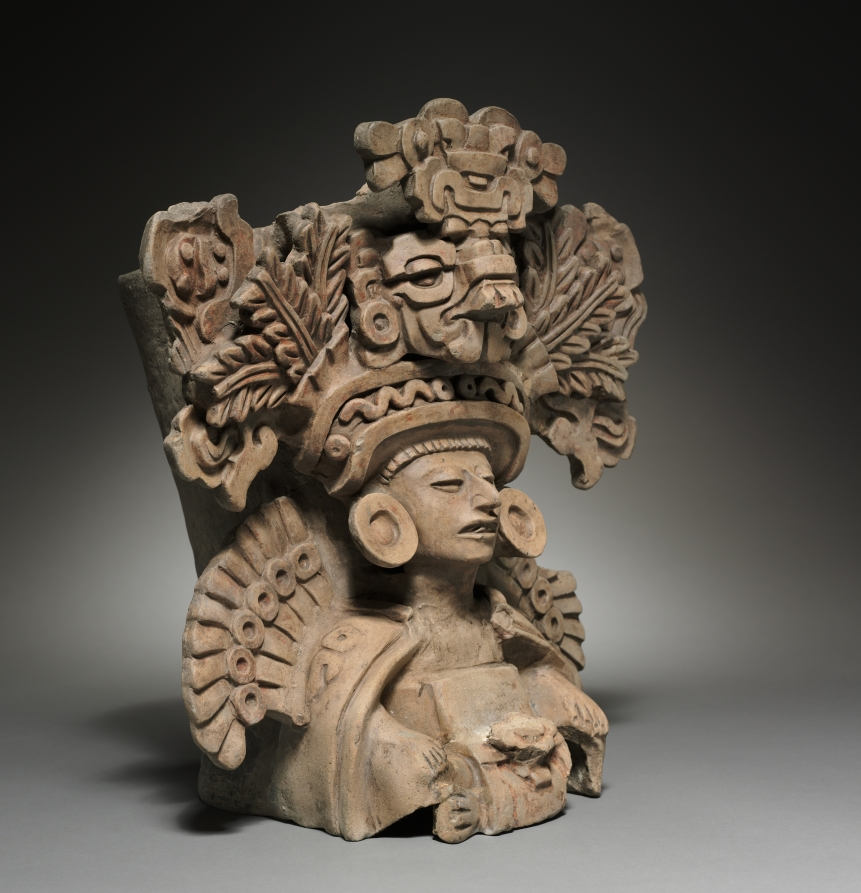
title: Funerary Urn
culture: Mexico, Oaxaca, Zapotec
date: 350–500 CE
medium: terracotta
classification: Sculpture